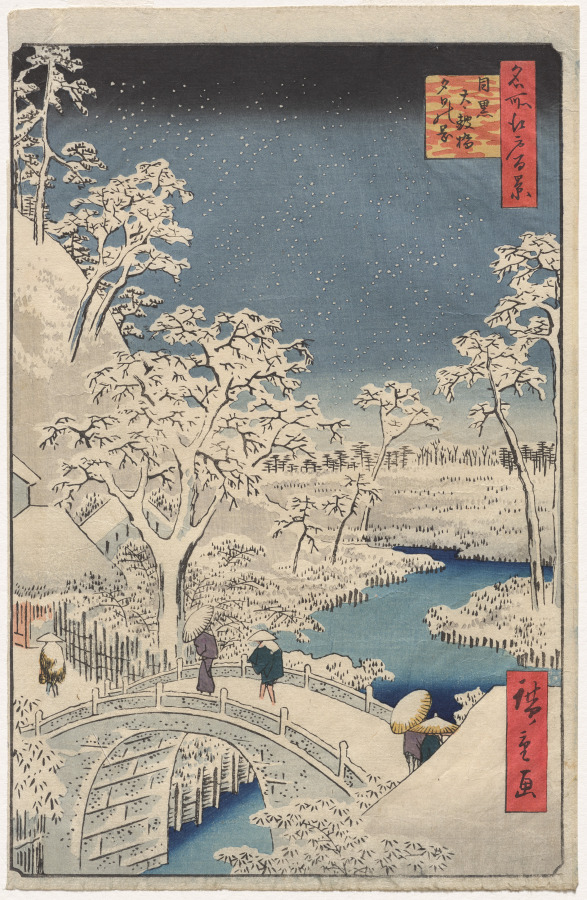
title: Meguro Drum Bridge and Sunset Hill, from One Hundred Views of Famous Places in Edo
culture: Japan, Edo period (1615–1868)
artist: Utagawa Hiroshige (Japanese, 1797–1858)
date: 1857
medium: color woodblock print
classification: Print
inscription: Signature: Hiroshige ga. Publisher: Uoya Eikichi (trimmed). Censorship Seal: aratame (trimmed).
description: The arched stone bridge over the Meguro River in Edo (now Tokyo) was known as the Drum Bridge for its resemblance to the rounded profile of a drum. This print shows people shielding themselves from the snow with hats and umbrellas as they cross it. In the foreground on the lower right, behind the artist’s signature, is the roof of a shop called Shōgatsu-ya that served shiruko mochi—a sweet red-bean soup with rice cakes that is a winter treat. Sunset Hill lies on the other side of the bridge and was once known for its red maple leaves in autumn.